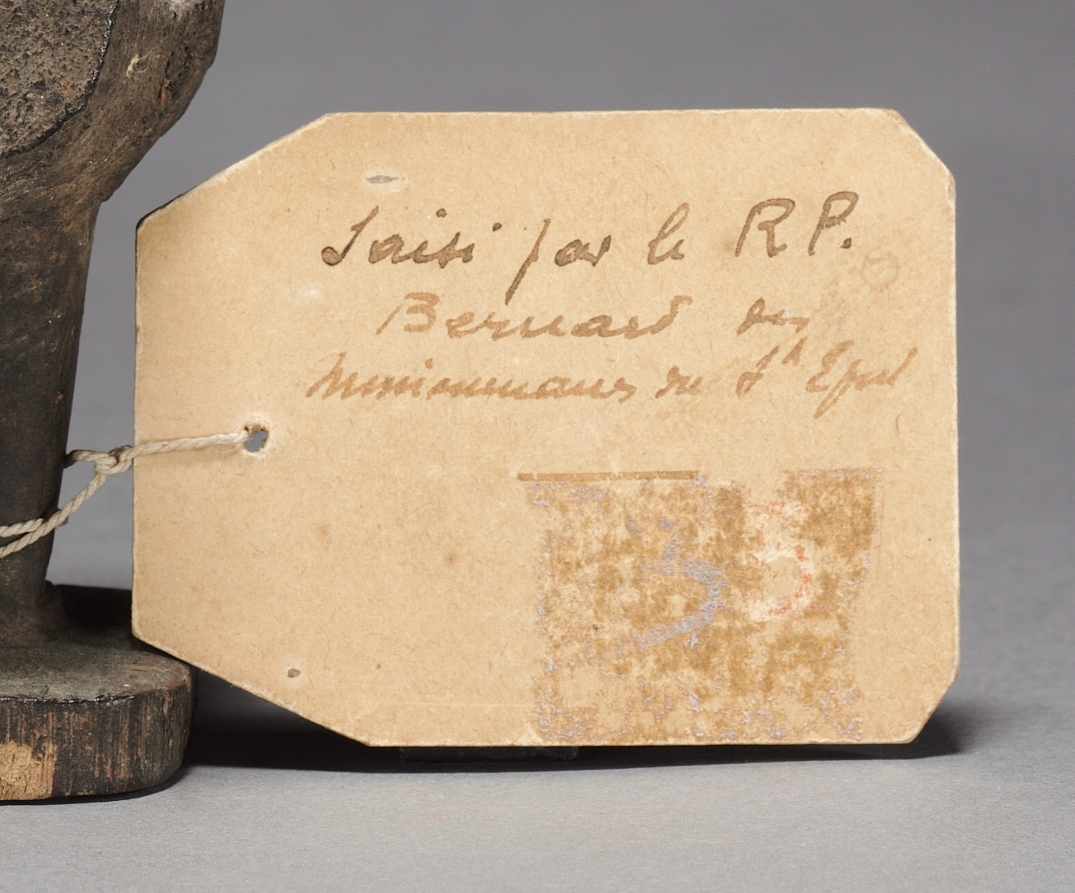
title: Power figure (nkisi)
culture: Africa, Central Africa, Republic of the Congo, Kongo-style maker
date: late 1800s-early 1900s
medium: Wood, organic materials (including resin), and metalized glass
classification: Sculpture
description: One of seven anthropomorphic figurines, these minkisi contained medicines in which an ancestral spirit was believed to reside. The medicines served a metaphorical rather than literal purpose in the resolution of conflicts among Kongo people. This figure contained white- and red-colored medicine loads on its belly and back. Its pose may refer to the nkisi’s capacity to see more than others.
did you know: The nduda minkisi were loaded with gunpowder and/or medicine to protect their owners and to shoot “witches” and other enemies.